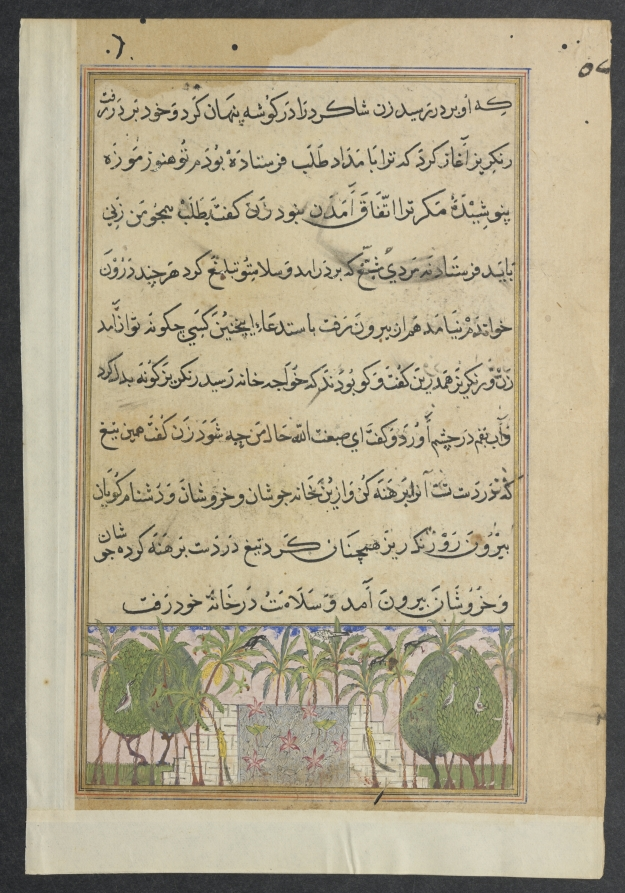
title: Landscape with a lotus pool, from a Tuti-nama (Tales of a Parrot): Eighth Night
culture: Mughal India, court of Akbar (reigned 1556–1605)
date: c. 1560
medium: gum tempera, ink, and gold on paper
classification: Painting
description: A serene, blue lotus pool is surrounded by plants and wildlife. Bright yellow squirrels climb up the thin trunks of date palms, while birds perch in the treetops. Fish swim in the stylized “basket-weave” water. This is one of only two non-narrative landscape scenes in this volume of the Tuti-nama.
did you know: The lotus pool has a long tradition in pre-Mughal painting.